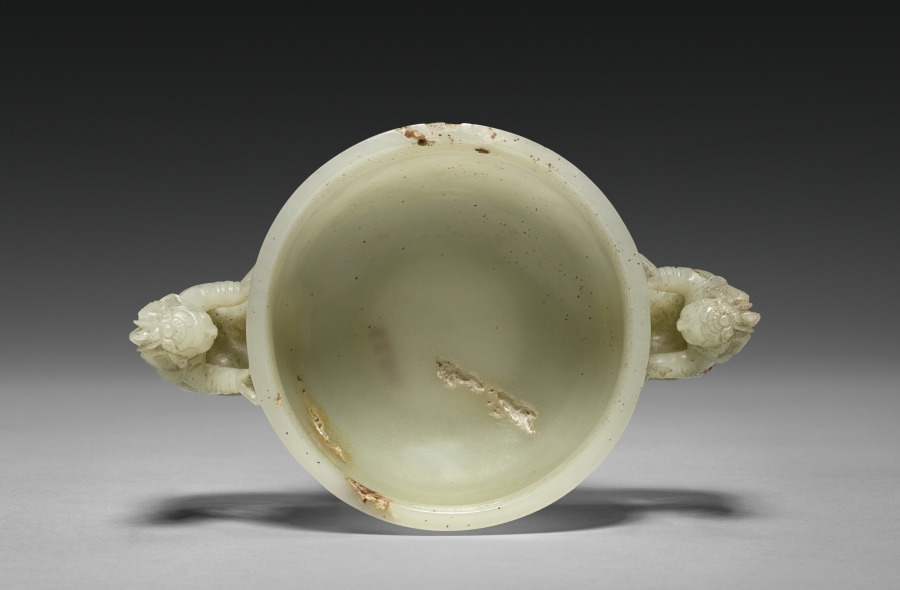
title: Cup with Daoist Figures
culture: China, Qing dynasty (1644–1911), Qianlong period (1736–95)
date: 1736–95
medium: Pale greenish-white jade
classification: Jade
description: During the Qing dynasty, Suzhou’s best products were sent north to the capital. Those that met imperial approval were sometimes graced with Qianlong’s mark, added by calligraphers and jade workers at court. The lack of a Qianlong mark on the Cleveland cup suggests that it might not have reached the court. Previously dated to the Yuan dynasty (1271–1368), new scholarship dates this cup to the Qing period.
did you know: Two female immortals serve as handles, while a Daoist procession with immortals, musicians, and attendants winds around the body of the cup.